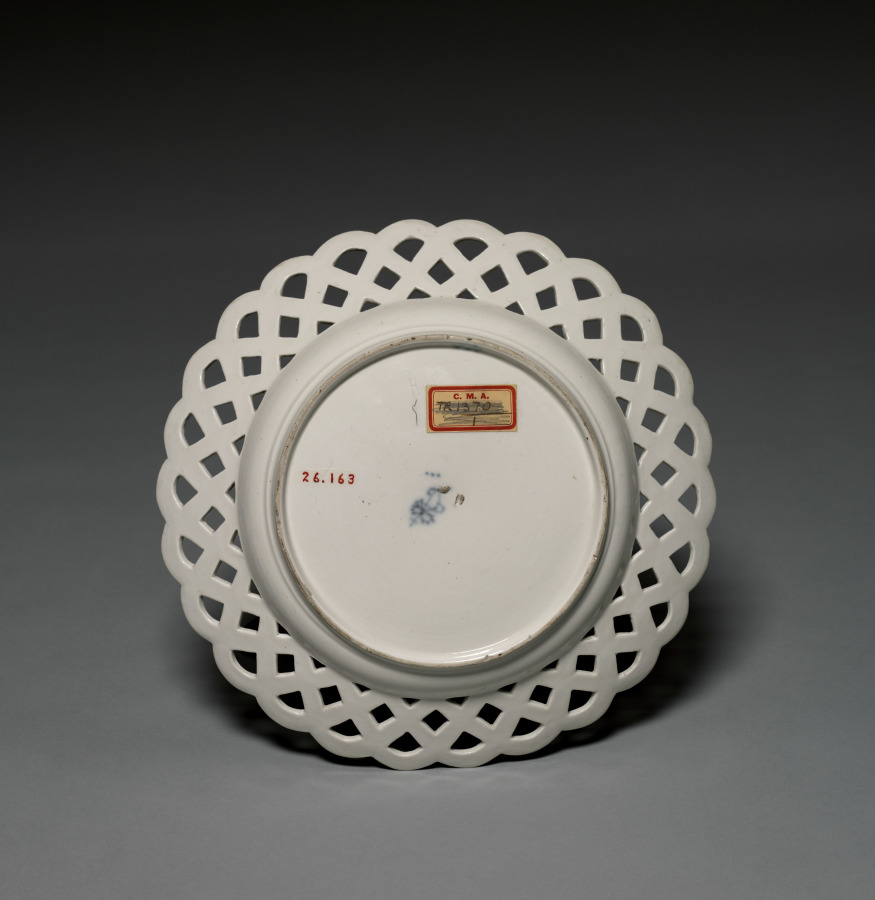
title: Plate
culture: Germany, 18th century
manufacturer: Frankenthal Porcelain Factory (German)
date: 1777–1799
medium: porcelain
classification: Ceramic